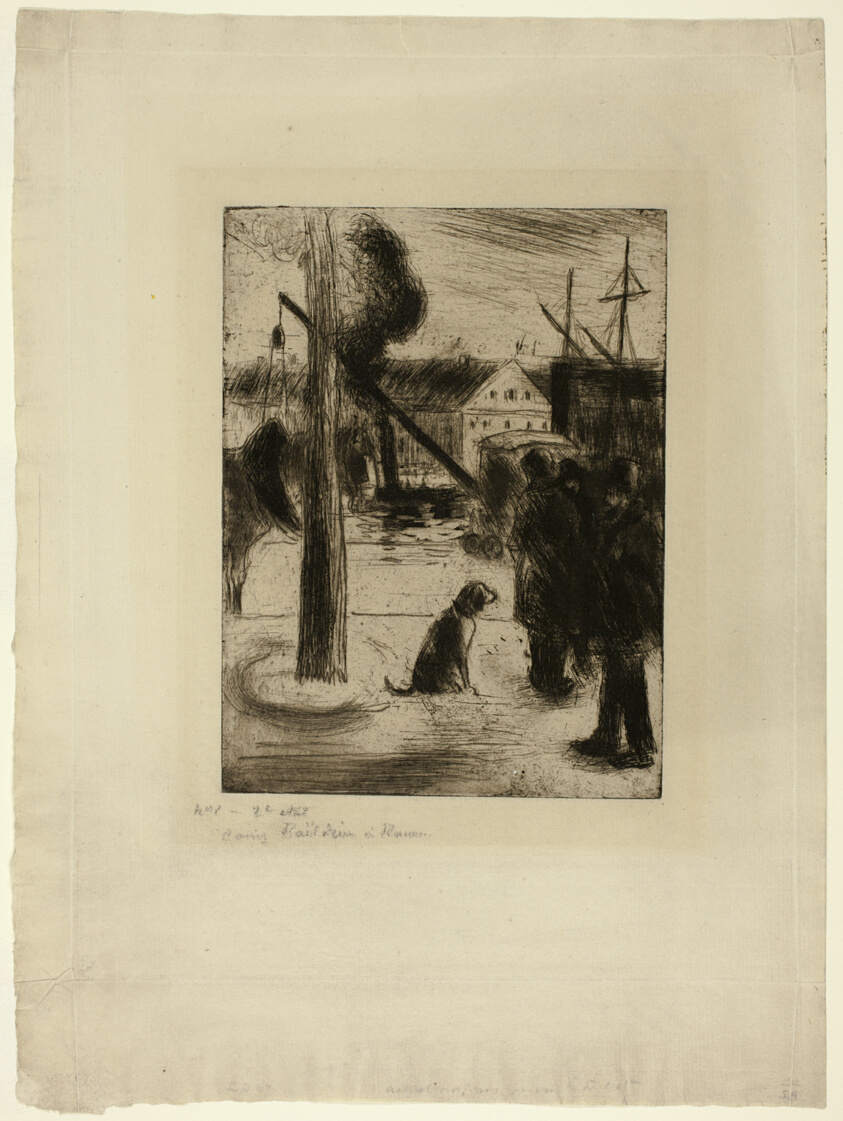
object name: Print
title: Promenade à Rouen: Cours Boieldieu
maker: Camille Pissarro (French, 1830-1903)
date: 1884/96, printed 1896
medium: Etching and drypoint in black on buff laid paper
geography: France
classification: etching; print; prints and drawing